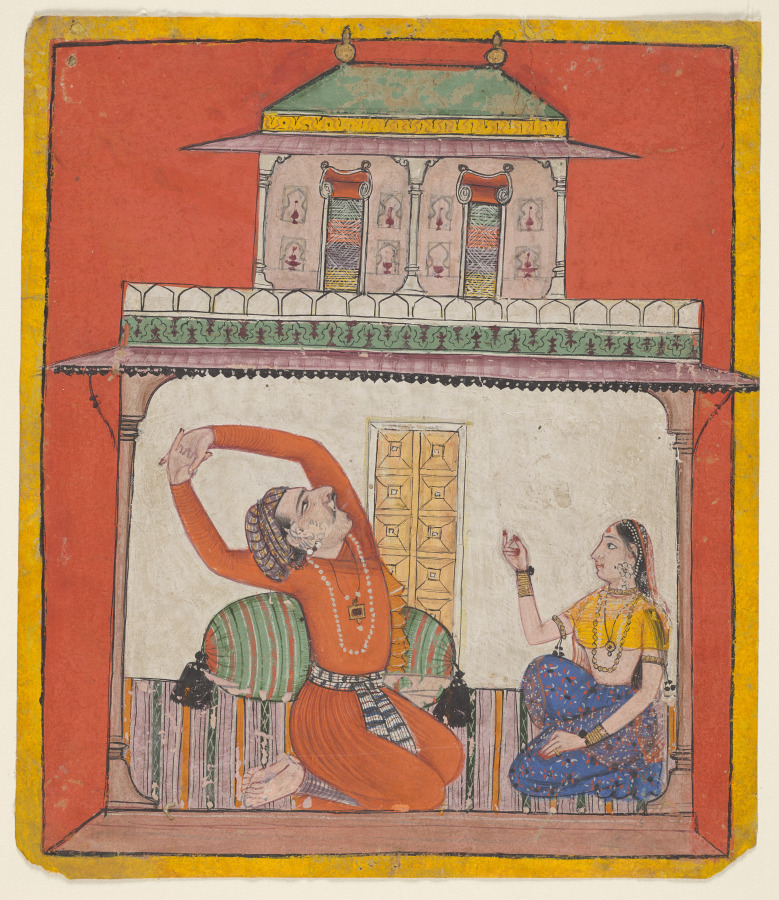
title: A couple in their chamber in early morning: Vighada Ragaputra of Shri Raga, from a Ragamala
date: c. 1700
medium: gum tempera and gold on paper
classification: Painting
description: A couple sits on a striped carpet (durri) inside a brightly lit chamber. The man stretches his arms, apparently having just awoken, while the woman kneels before him in a gesture of address. Architectural details on the second floor include niches for bottles and red curtains rolled up to allow a breeze to pass through colorful bamboo screens.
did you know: Vigadh is also known as vihaga, a word for “morning” in Pahari languages.